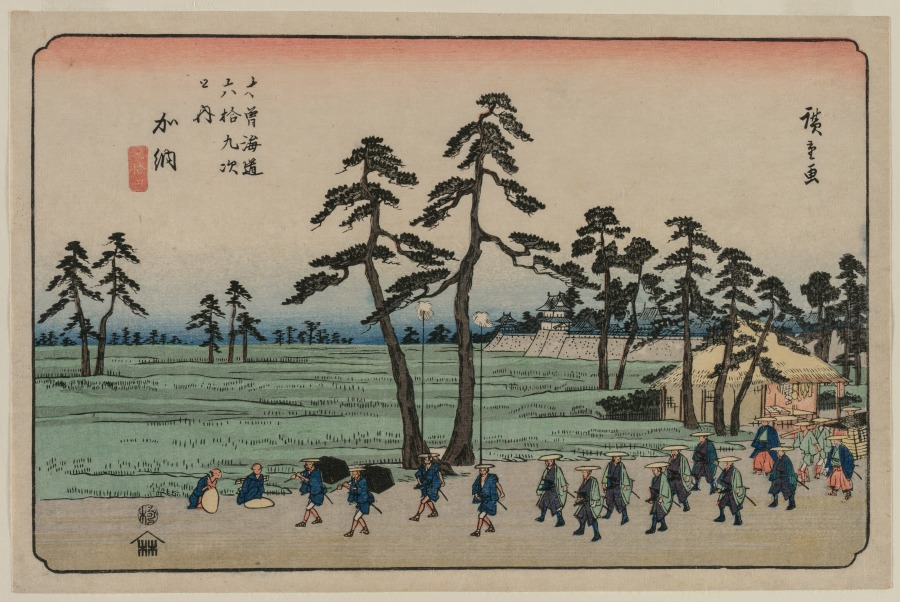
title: Kanō, from the series Sixty-nine Stations of the Kisokaidō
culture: Japan, Edo period (1615–1868)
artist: Utagawa Hiroshige (Japanese, 1797–1858)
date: c. 1835–37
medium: Color woodblock print, ink and color on paper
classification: Print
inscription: Signature: Hiroshige ga Publisher: Iseya Rihei (emblem) Censorship Seal: kiwame